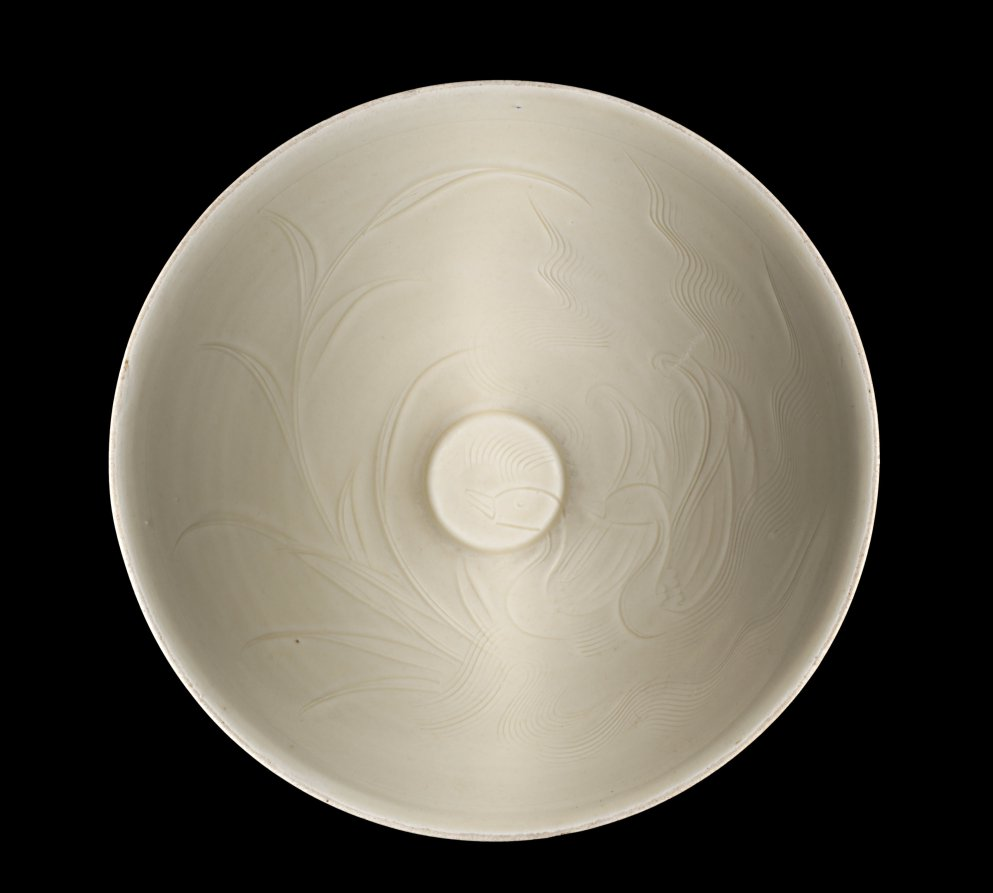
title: Bowl with Ducks among Waves and Reeds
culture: China, Hebei province, Quyang, Northern Song dynasty (960-1127)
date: 1100s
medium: cream-glazed porcelain with incised decoration, Ding ware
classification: Ceramic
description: Delicacy and refinement, combined with simplicity of shape, make Ding ware particularly attractive. The best pieces were selected by the Northern Song court for imperial use. The white, thin body is covered with a transparent ivory glaze that occasionally runs down toward the foot, forming streaks or drops called "tear-stains" by the Chinese connoisseurs. As the vessel was fired upside down, the rim was unglazed and could be bound with a metal band, such as copper or precious silver and gold.